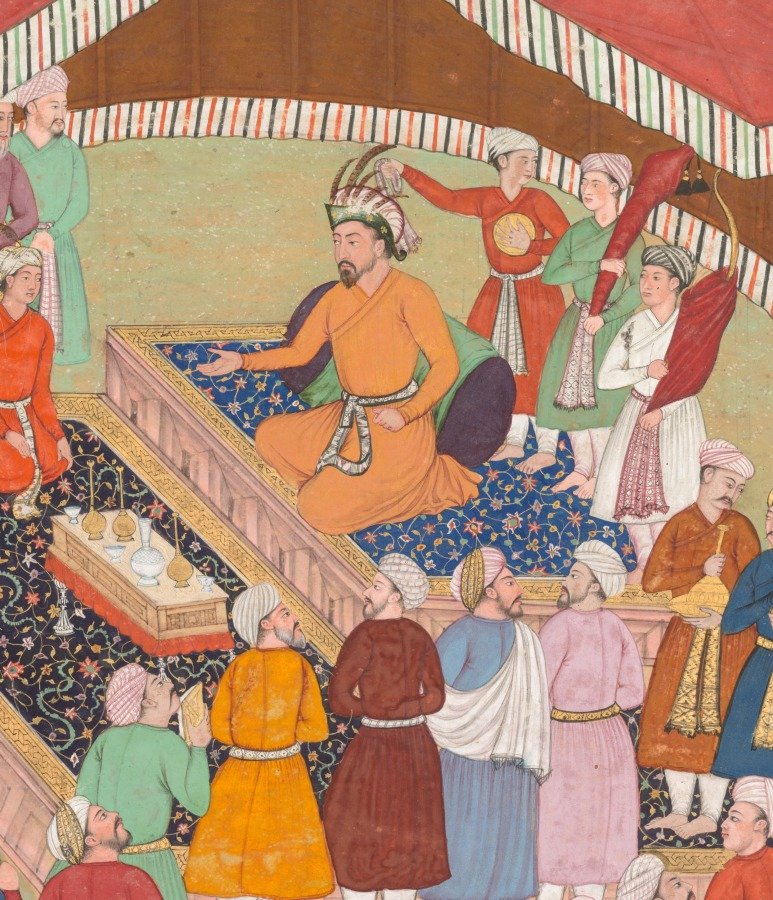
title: Hulagu Khan giving a feast and dispensing favor upon the amirs and princes, from a Chingiz-nama (Book of Chingiz Khan) of the Jami al-tavarikh (Compendium of Chronicles)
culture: Mughal India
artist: Lal (Indian, active c. 1555–1600)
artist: Dharam Das (Indian, active c. 1580–1605)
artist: Padarath (Indian, active late 1500s)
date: c. 1596–1600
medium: Gum tempera, ink, and gold on paper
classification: Painting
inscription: inscription at the base of the painting: tarih Lal 'amal-i Dharam Das tuze name cherehe Padarath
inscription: Persian inscription in top margin, in nasta‘liq script: Hulagu Khan giving a feast and dispensing favor upon the amirs and princes Persian inscription in bottom margin, in nasta‘liq script: Outline drawing by Lal, [color] work by Dharam Das, important portraits by Padarath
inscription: Verso: Text of Hulagu Khan giving a feast and dispensing favor upon the amirs and princes Persian text in nasta‘liq script: [cont. from recto] in the Land of Sham [Syria], [that] would surrender if he [Khurshah] gave the word; otherwise, it would have taken years before they could be overrun. So he [Hulagu] kept him for a while, and he was treated with respect and dignity. And then he dispatched him to the service of the Great Khan [Mongke]. And regarding his [Khurshah’s] death, there are different versions. The truth is that when news reached the Great Khan that Khurshah was on his way, he said: “Why are they bringing him [here] and tiring the packhorses to no purpose?” And he [Mongke] dispatched envoys who did away with him en route. And at this end, after Khurshah had been sent off on the road, they murdered his entire family and household on the road between Abhar and Qazvin, including men, women, and infants still in their cradles, so that not a trace of them was left. And the duration of the rule of the Ismailis in these regions is around one hundred and seventy-seven years, starting from the year four hundred and seventy-seven [AD 1084], and the word “Alamut” is its chronogram. It ended on the first of Dh’ul Qa’da 654 [20 November 1256]. And the number of their rulers is seven, in this manner and sequence: first, Hasan son of Ali son of Muhammad al-Sabbah al-Hamayri; second, Kiya Buzug Ummid, and he and Hasan [the first ruler listed] were both Ismaili missionaries; third, Muhammad Hasan Buzurg Ummid, who is known as ‘Ala dhhkirhi’l-Salam; fourth, Hasan son of Muhammad Buzurg Ummid; fifth, Muhammad Jalal al-Din son of Hasan and they call him Hasan the New Musulman; sixth, ‘Ala al-Din son of Muhammad son of al-Hasan son of Muhammad; seventh, Rukn al-Din Khurshah son of ‘Ala al-Din, in whose time the dynasty fell. And the conquest of those fortresses and edifices is finite proof of the plenitude of the good fortune of Mongke Khan and his brother Hulagu Khan, who managed to accomplish such a momentous task in such a short span of time with such ease and facility; for had it not been for that good fortune, the conquered domains would have been ruined, faced with the difficulties of providing and transporting provisions and drink. These are the events and accounts of the conquest of the lands of the Ismaili heretics, as mentioned above. Finis. The narrative of Hulagu Khan turning toward Kohistan after the capture of the heretics’ fortresses and receiving Bayju Noyan from Anatolia and his interrogation by Hulagu Khan and his dispatch again to Anatolia to complete the conquest Hulagu Khan, when he had completed the conquest of the citadels and lands of the [Ismaili] heretics, in Rabi‘ al-awwal of the year 655 [AD 1257] from the region of Qazvin, proceeded toward Hamadan. And Bayju Noyan arrived from the direction of Azerbaijan. Hulagu Khan was upset with him and shouted at him saying, “Since the passing of Churmaghun Noyan, what have you done in the Land of Iran, and which army have you defeated, and which rebel have you managed to bring into obedience, aside from instilling fear into the Mongol army with accounts of the caliph’s might and grandeur?” He [Bayju] knelt down and said: “I committed no wrong, but did what I could as presented to you. I have subjugated the land from the gates of Rayy to the borders of Anatolia and Syria, all save the matter of Baghdad. It is difficult to take the army there given the difficult roads ahead, the heavy population, and their vast army and arms. It is for the mighty ruler [padshah] to decide and I will obey whatever he decrees.” These words alleviated his [Hulagu’s] anger and he decreed thus: “You must go and conquer lands as far as the shores of the western sea from the hands of the sons of Efrins and Lanktar.” Bayju returned at once and took an army to Anatolia; and at that time the sultan of Anatolia, Ghiyath al-Din Kai-Khusrau son of ‘Ala al-Din, met Bayju Noyan in battle at Kusa Dagh and was defeated. And Bayju conquered the whole of Anatolia and indulged in plunder. And Hulagu Khan accompanied by princes Ghuli and Balagha and Tutar and chief commanders Buqa Timur and Qudusun and Qata and Sunjaq and Kuka Ilgai, camped in the Hamadan plain near Hatimabad, which is a meadow with tamarisk trees, and began to prepare and arrange the troops. Finis. The emergence of tumult in Baghdad and the discord between the chief secretary and the vizier and the beginning of the caliph of Baghdad’s demise In the year 654 [AD 1256] at the end of the summer, a great flood came down and inundated the city of Baghdad in such a way that the lower part of the buildings there were submerged in water and disappeared, and for fifty days the flood was on the rise, and then it began to subside, and half of the habitations in Iraq were destroyed, and to date the Musta‘sami Flood is remembered as a byword [for a damaging flood] among the people of Baghdad. And in the midst of this catastrophic event, the rabble, ruffians, and misfits embarked on looting and gained the upper hand and every day killed a lot of people. And Mujahid al-Din Aybek, the chief secretary, gathered the rabble and the misfits around himself and in a short space of time built up a power base, and when he felt empowered and saw that Caliph Musta‘sam was indecisive and naive in judgment, he consulted with some of the notables in order to oust him from his position and place another Abbasid in his place, and vizier . . .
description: Seated on a lapis-blue floral carpet is Chingiz (Genghis) Khan’s grandson, who ruled Iran from 1256 to 1265. This painting is from an illustrated copy of the history of Chingiz Khan and his family that the Mughal emperor Akbar commissioned toward the end of the latter’s life. Mughal is the Persian word for Mongol, and Akbar traced direct genealogical descent from Chingiz Khan on his mother’s side. The nomadic Mongols created court settings using portable platforms and elegant carpets and tents. Multilevel canopies of imperial crimson mark the position of the khan, which means “ruler” in Mongolian.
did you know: Mongol rulers were identified by the five-feathered crown.